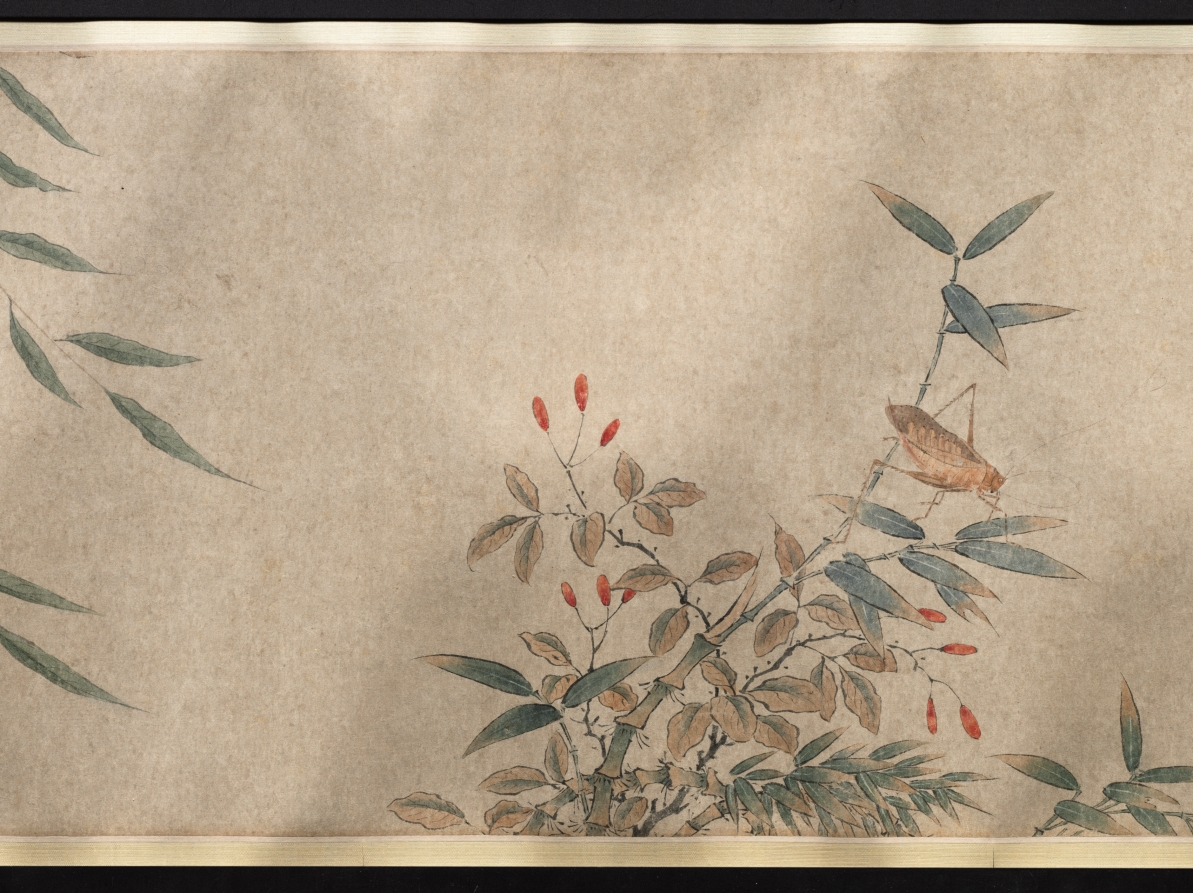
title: Insects and Flowers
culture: China, Qing dynasty (1644-1911) or Republican period (1912-49)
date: c. 1900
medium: Handscroll, ink and color on paper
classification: Painting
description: More than 26 feet long, this scroll presents insects, reptiles, and plants in delicate brushwork and pale colors, referring in style to earlier Southern Song dynasty (1127–1279) bird-and-flower paintings. Upon closer inspection, ants dismember a butterfly and reptiles wait to ambush their prey. An inscription at the end of the painting gives us an idea of its meaning: Attributed to the Qing dynasty scholar Zhang Xigeng (張錫庚, 1801–1861), the inscriber relates the work to an earlier painting by Qian Xuan (錢選, c. 1235–before 1307) and further suggests that the painting may allude to the relentlessness of natural selection. By drawing a parallel to tumultuous episodes in Chinese history, the writer might even hint at the domestic rebellions and the aggression of Western powers against China in his lifetime, particularly the Opium Wars (1839–60).